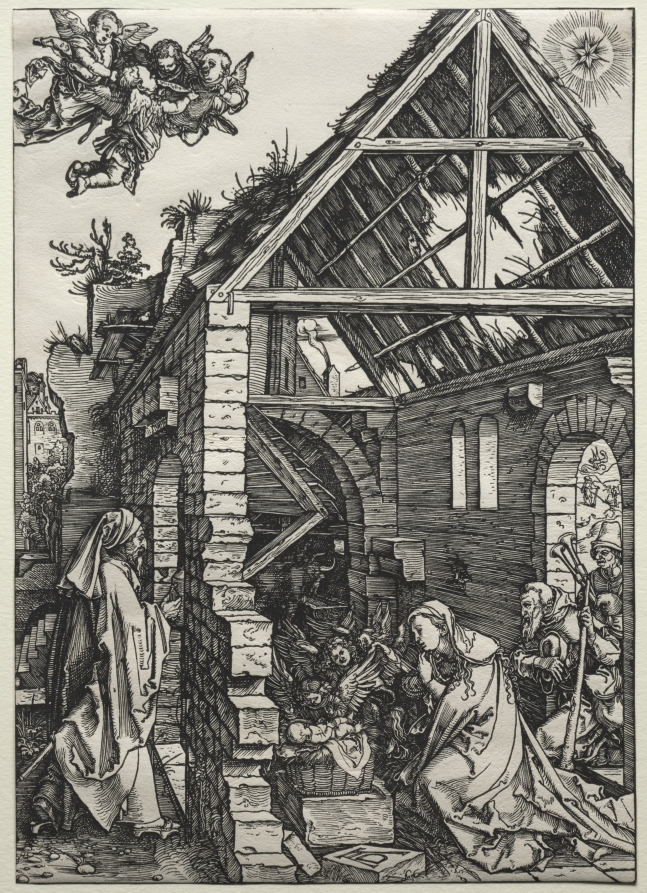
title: The Nativity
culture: Germany, early 16th Century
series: The Life of the Virgin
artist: Albrecht Dürer (German, 1471–1528)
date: c. 1502–3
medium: woodcut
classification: Print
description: These eight woodcuts (1959.99.8–15) progress from Gabriel’s announcement to Mary that she would bear the Son of God, to the events of her early motherhood and beyond. This included the joy of sharing her pregnancy with her cousin Elizabeth, Jesus’s birth, and the subsequent arrival of the magi. After Jesus’s circumcision and presentation at the temple the Holy Family fled to Egypt to avoid Herod and stayed there for several years. The seemingly out of place last scene shows a glimpse of their daily life in Egypt as Joseph continues his carpentry and Mary spins wool. The Holy Family is surrounded by angels and helpful putti and are blessed by God the Father and the Holy Spirit in the form of a dove overhead.